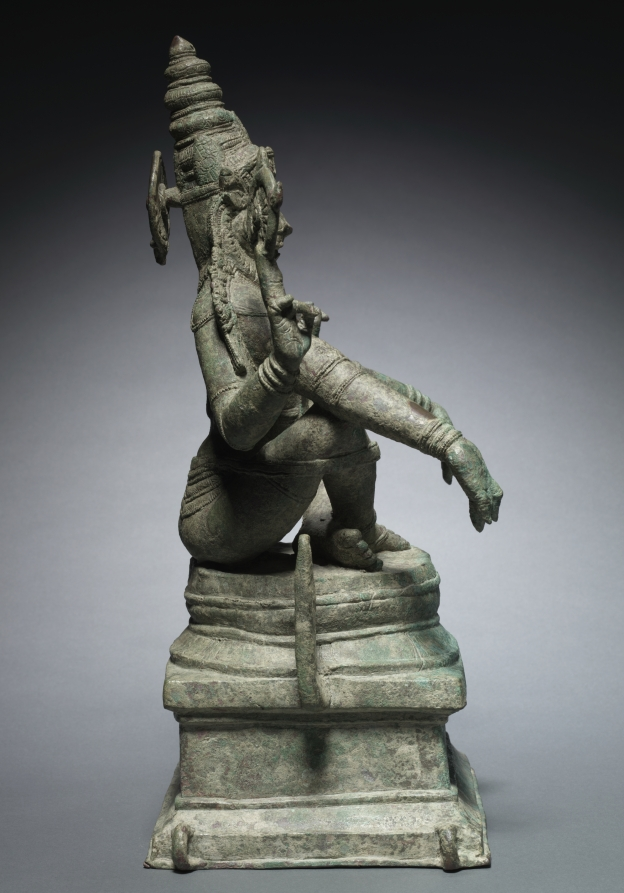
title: Yoga Narashimha, Vishnu in his Man-Lion Avatar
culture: South India, late Chola Period (900-13th Century)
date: c. 1250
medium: bronze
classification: Sculpture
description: The two posts on either side are for holding a halo that once encircled the figure.